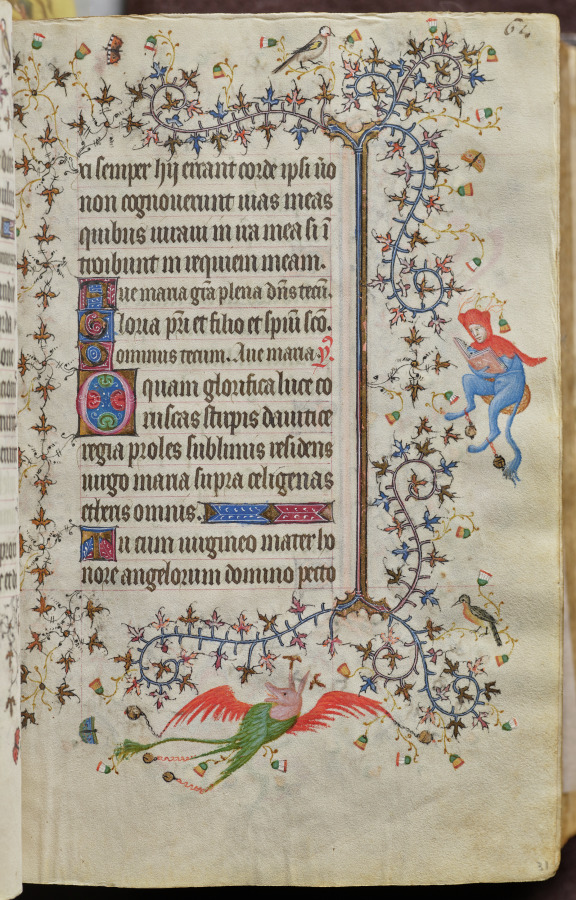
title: Hours of Charles the Noble, King of Navarre (1361-1425): fol. 31r, Text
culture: France, Paris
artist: Master of the Brussels Initials and Associates (French)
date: c. 1405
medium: ink, tempera, and gold on vellum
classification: Bound Volume